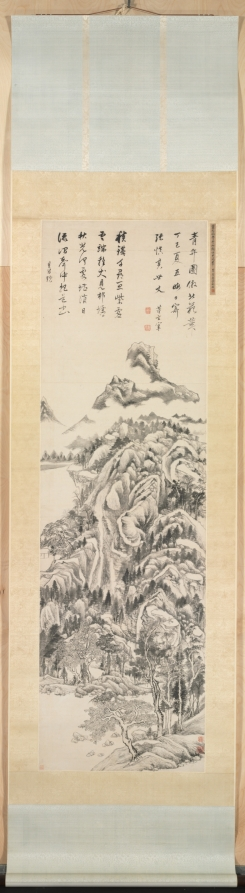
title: Mt. Qingbian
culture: China, Ming dynasty (1368–1644)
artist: Dong Qichang (Chinese, 1555–1636)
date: 1617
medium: hanging scroll, ink on paper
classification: Painting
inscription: Artist's first inscription, signature, and 2 seals: A painting of the Qingbian Mountains in the manner of Beiyuan [Dong Yuan]. In the summer of the dingsi year [1617], on the last day of the fifth month, [I] send this to my senior, Zhang Shenqi. Dong Xuanzai [seals] Zhi zhi hao ri jiang guan 知制誥日講官; Dong Qichang yin 董其昌印.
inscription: Artist's second inscription and signature: Piling irons for ten thousand feet guard the purple sky;/ Where puppies are seen on top of clouds, villages and marketplaces lie./ In the splendor of autumn, where is the most worthy spot to spend the day?/ Amid the rustling sounds of mountain streams, with a volume in hand, meditating on the Way [Dao]. Inscribed by Qichang. (trans. WKH/LYSL)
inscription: 4 additional seals: 3 of Li Enqing 李恩慶 (jinshi of 1833); 1 of Weng Wan-go 翁萬戈 (b. 1918).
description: Dong Qichang radically transforms the landscape composition into a purely abstract design. He organizes the mountain forms to achieve an overall sense of structure, activating the flow of energy (qi) and the momentum of force (shi) throughout the pictorial design. In his art, brush and ink assume life independent of the depicted forms, so that the painting can be appreciated for “the sheer marvels of brush and ink.”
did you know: Dong Qichang had visited the Bian Mountains, which are part of a low range located not far from Wuxing and Lake Tai in the southern province of Zhejiang.